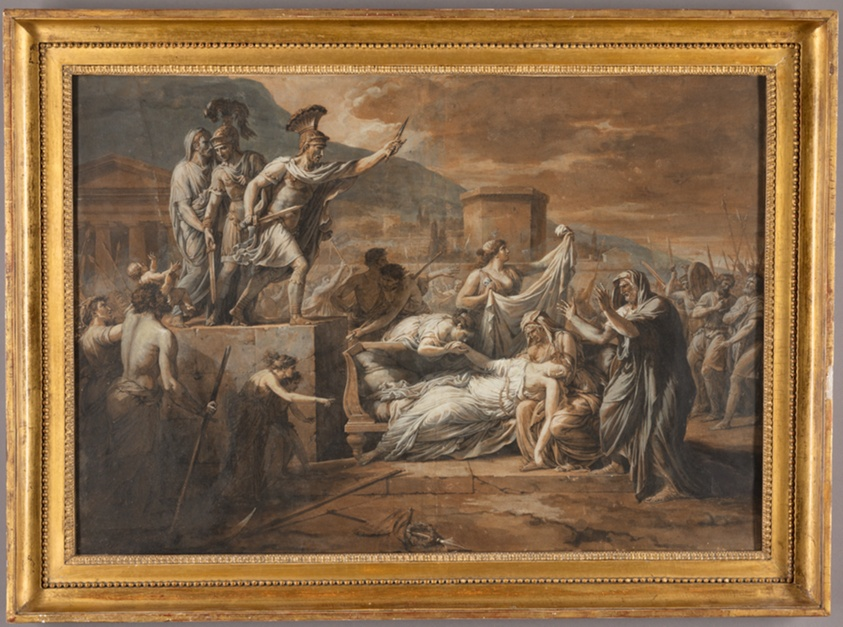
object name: Drawing and Watercolor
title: Brutus Exhorting the Romans after the Death of Lucretia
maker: Étienne Barthélemy Garnier; French, 1759-1849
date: c. 1790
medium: Brush and brown and black ink washes, over pen and black ink and traces of black chalk, with opaque white paint, on cut and pieced cream laid paper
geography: France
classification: brush and ink; drawings (visual works); brush and wash; prints and drawing